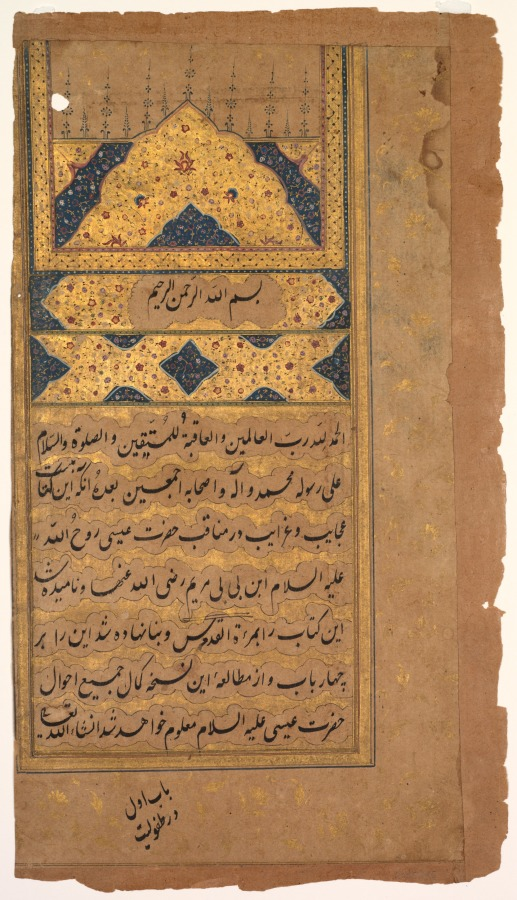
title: Illuminated opening page (folio 1 verso) and 131 folios with Persian text, from a Mirror of Holiness (Mir’at al-quds) of Father Jerome Xavier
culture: Mughal India, Allahabad, made for Prince Salim (1569–1627)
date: 1602–4; margins added with rebinding, about 1900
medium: Gum tempera, ink, and gold on paper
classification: Manuscript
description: The opening page of this Christian manuscript is ornamented in the manner of books made for elite Islamic patrons. Using costly pigments made from the semiprecious blue stone called lapis lazuli and gold paint, the artists created contrasting ground colors to set off delicate floral arabesques that evoke the waters and light of paradise. The text was written in Persian, the official court language of the Mughal rulers in India, and read from right to left. Father Jerome had studied Persian in India for seven to eight years before Akbar asked him to produce a history of the life of Jesus in Persian.